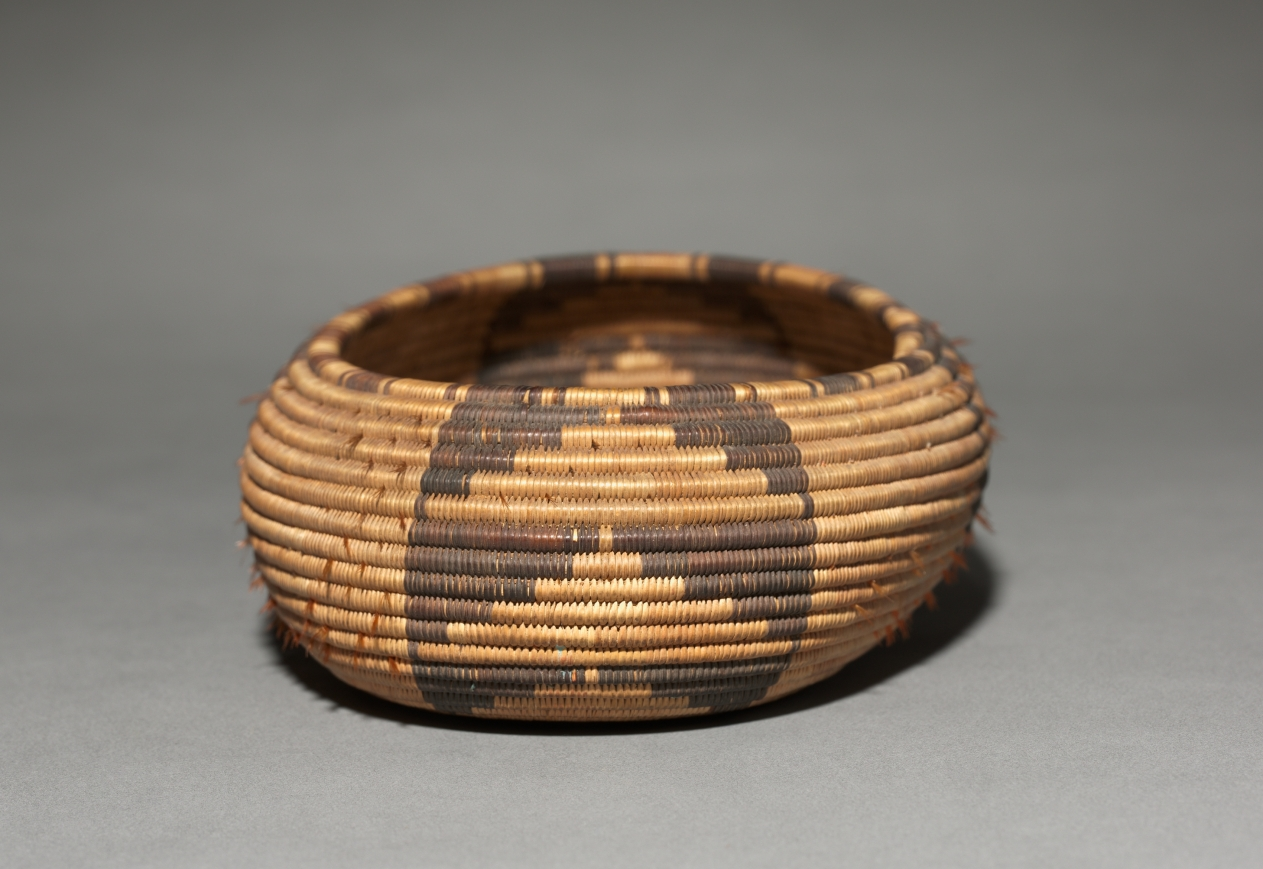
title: Gift Bowl, Canoe- Shaped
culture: California, Pomo, late 19th- early 20th century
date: 1890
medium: Willow, Bulrush, Sedge, with feather and acorn woodpecker; coiled (3 rods)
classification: Basketry